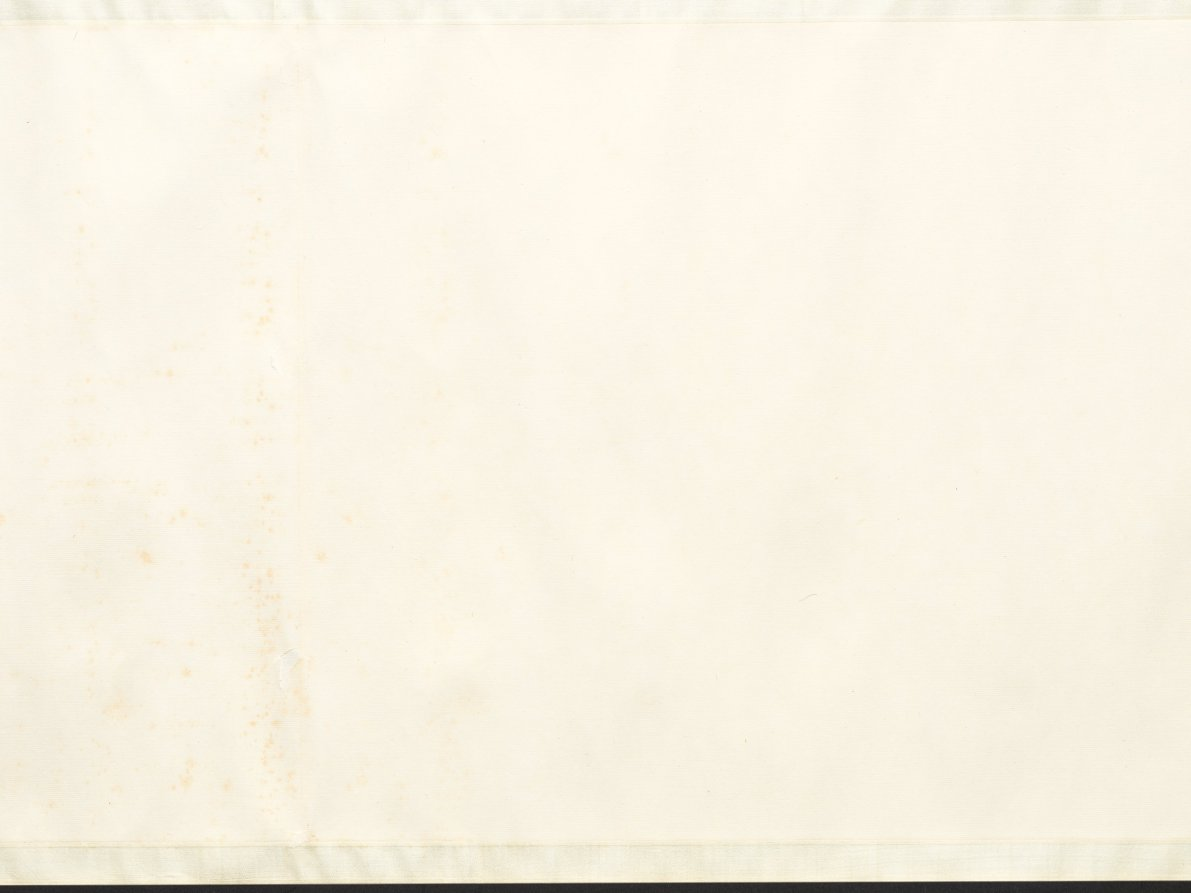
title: Fisherman's Joy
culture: China, Ming dynasty (1368–1644)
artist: Qian Gu (Chinese, 1508–c. 1578)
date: 1572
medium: Handscroll; ink and light color on paper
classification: Painting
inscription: Artist's inscription, signature, and seal: On the autumn day of the jen-shen year [1572], P'eng-ch'eng, Ch'ien Ku painted [this]. [seal] Hsüan-ch'ing shih. 2 colophons, both dated 1689, and 5 additional seals of Yün Shou-p'ing (1633-1690).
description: This painting has a scene showing two small crafts, each manned by two fishermen, practicing a traditional fishing method. In one of them, a man uses a bamboo pole to direct the movements of a cormorant bird sent into the water. Cormorant fishing, witnessed in some areas of the lower Yangzi River, appears in Zhe school paintings. Qian Gu may have borrowed these narrative figure scenes from Zhe school paintings, while his vantage point, brushwork, and soft tones align with the Wu school style. Scenes of fishermen appealed to urban and educated audiences who idealized the self-sufficient independence of fisherfolk.